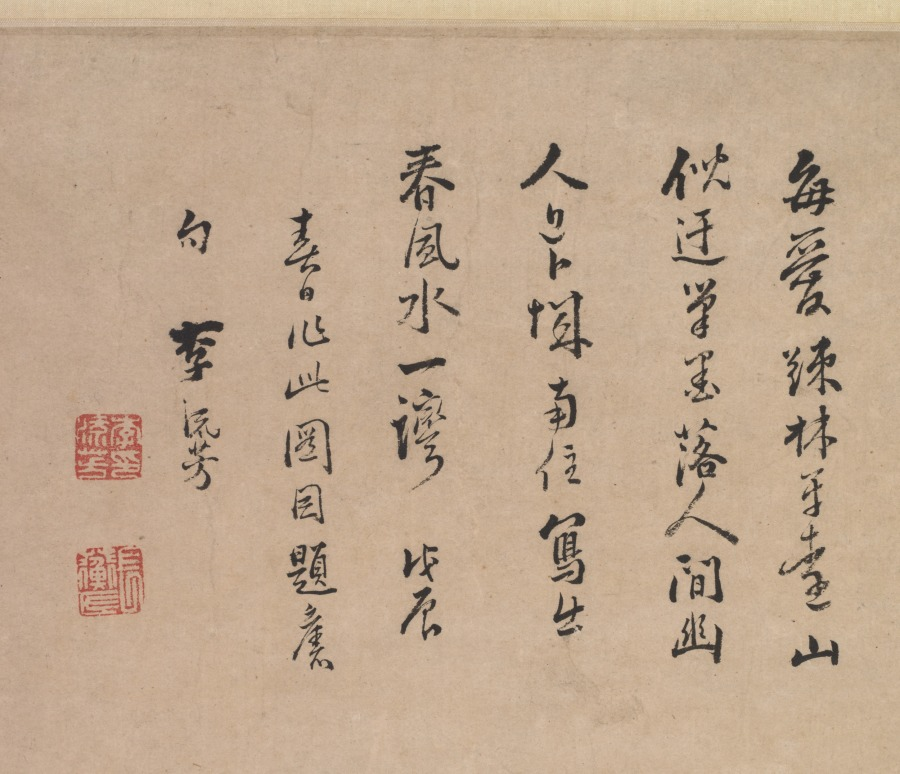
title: Thin Forest and Distant Mountains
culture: China, Ming dynasty (1368–1644)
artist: Li Liufang (Chinese, 1575–1629)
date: 1628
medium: hanging scroll, ink on paper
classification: Painting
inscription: Artist's inscription, signature, and 2 seals: Thin forest and distant mountains have always attracted me; As if they were from the brush and ink of Ni Tsan, left behind by the master in this mortal world. Now that the quiet recluse has chosen to live in the South of the City. He paints the spring breeze---over a curve of the river. In the spring day of the wu-ch'en year [1628] I made this painting and attached an old poem. Li Liu-fang [seals] Li Liu-fang-yin; Chang-heng shih. trans. WKH 1 additional seal of Chung Wen-ming (17th c.).